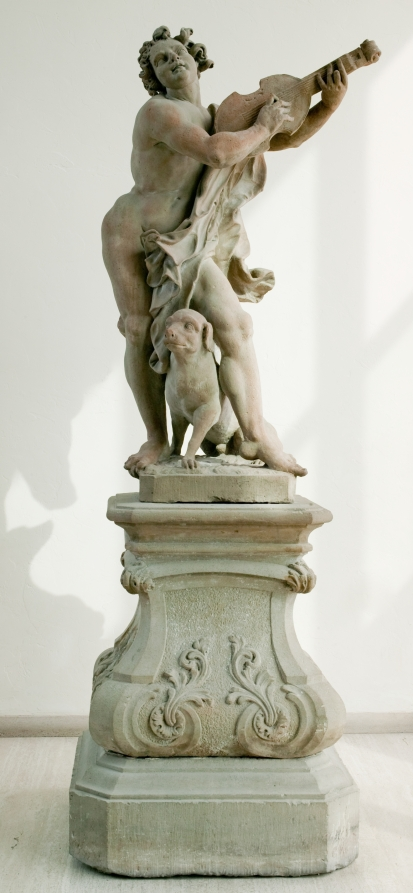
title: Orpheus and Cerberus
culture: Germany, near Bamberg, 18th century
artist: Ferdinand Tietz (Austrian, 1708–1777)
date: c. 1765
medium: sandstone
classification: Sculpture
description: This work was one of numerous sculptures Tietz created for the gardens of Schloss Seehof, near Bamberg in Bavaria (Germany), the summer residence of the Prince Bishops of Bamberg. The exaggerated forms of Orpheus's face and musculature caricature the idealized proportions of classical sculpture. A further parody exists with his companion: the usually terrifying hound Cerberus is here nothing more than a docile puppy, sitting calmly at Orpheus's feet. Meant to be viewed outdoors, on a high pedestal and from a distance, this work is less finely detailed than sculptures Tietz made for indoor settings at Seehof.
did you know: Taught to play the lyre by the Greek god Apollo, Orpheus's legendary musical abilities had the power to charm animals.